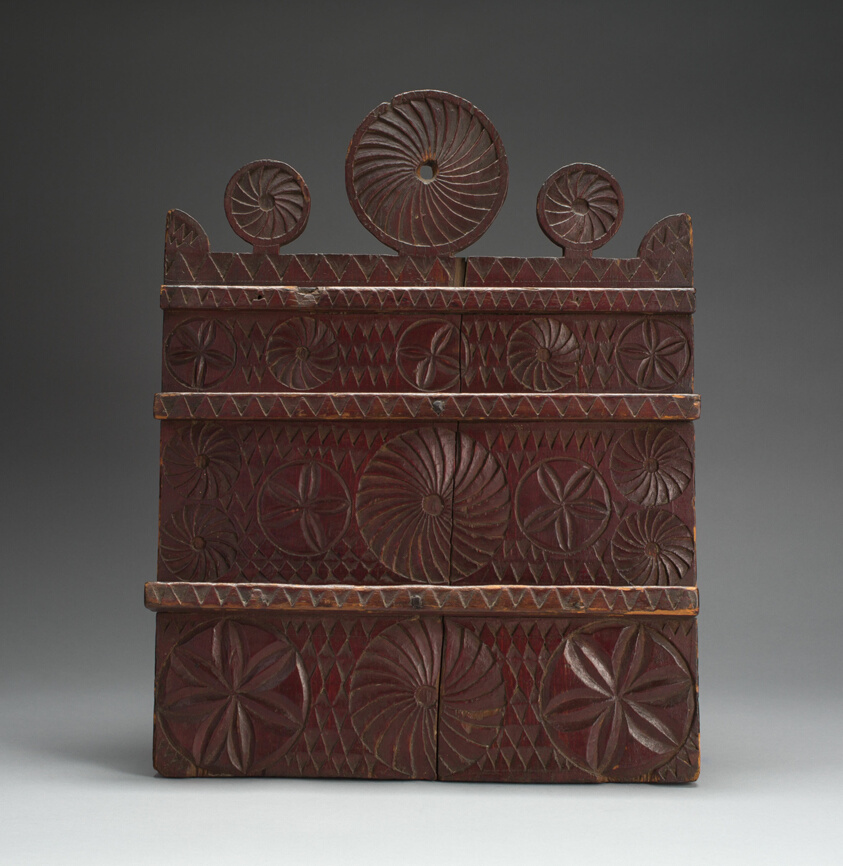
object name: Decorative Arts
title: Spoon Rack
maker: Artist unknown (American, active 18th–19th century); Probably New Jersey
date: 1750–1850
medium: White pine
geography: New Jersey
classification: wood; american decorative arts; american arts; decorative arts